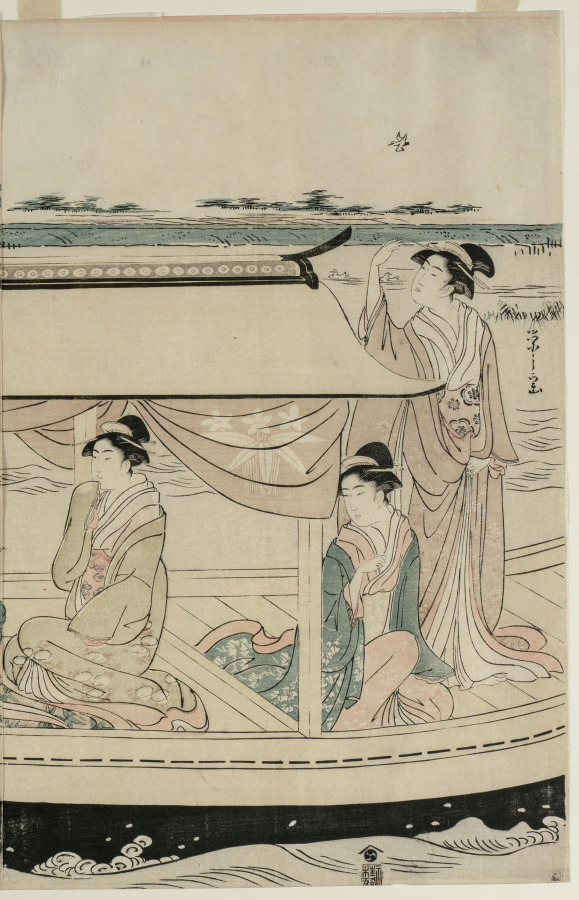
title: Women in a Pleasure Boat on the Sumida River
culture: Japan, Edo period (1615–1868)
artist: Chōbunsai Eishi (Japanese, 1756–1829)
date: early 1790s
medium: woodblock print from a triptych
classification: Print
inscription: Signature: Eishi ga Seal: Nishimuraya Yohachi (Eiju han, emblem).